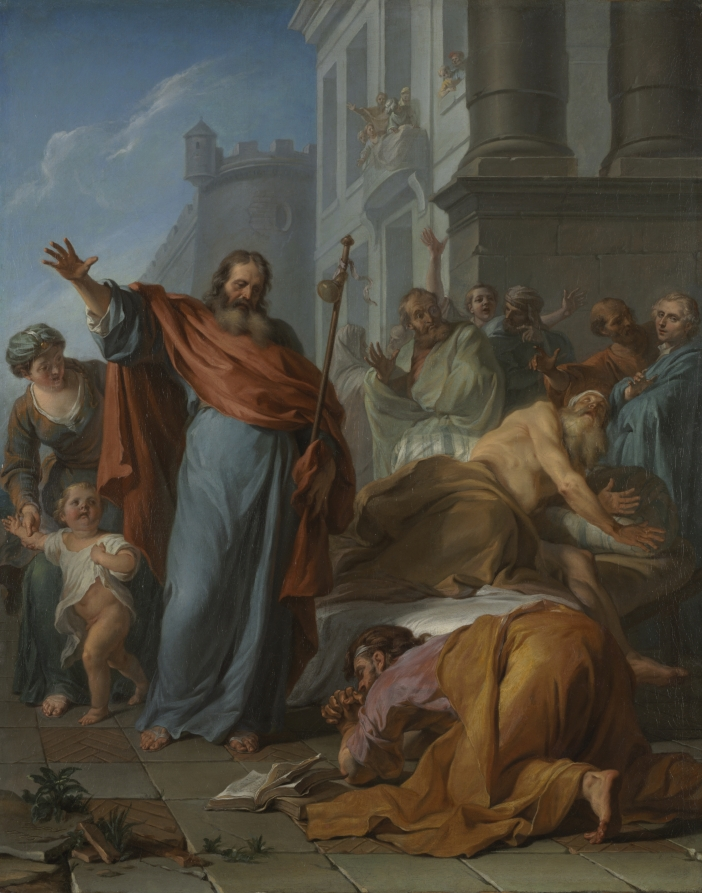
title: The Miracles of Saint James the Greater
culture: France, 18th century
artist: Noël Nicolas Coypel (French, 1690–1734)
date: 1726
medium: oil on canvas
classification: Painting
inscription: Signed lower left: "N. Coypel / 1726"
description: Noël Nicolas Coypel combined two stories associated with Saint James the Greater, one of the twelve apostles of Christ. In the foreground is the magician Hermogenes, begging forgiveness. Hermogenes had cast a spell on James, but the saint turned the curse back on him. When James offered to protect Hermogenes against the demons assaulting him, the magician cast aside his pagan texts in favor of Christianity. According to the second legend, James miraculously cured a paralytic man (in the middle ground at right), thereby averting his own execution and causing the prosecutor to convert. Although this painting is relatively small, the clear composition, grand architectural setting, and dignified and expressive poses of the figures endow it with monumental presence.